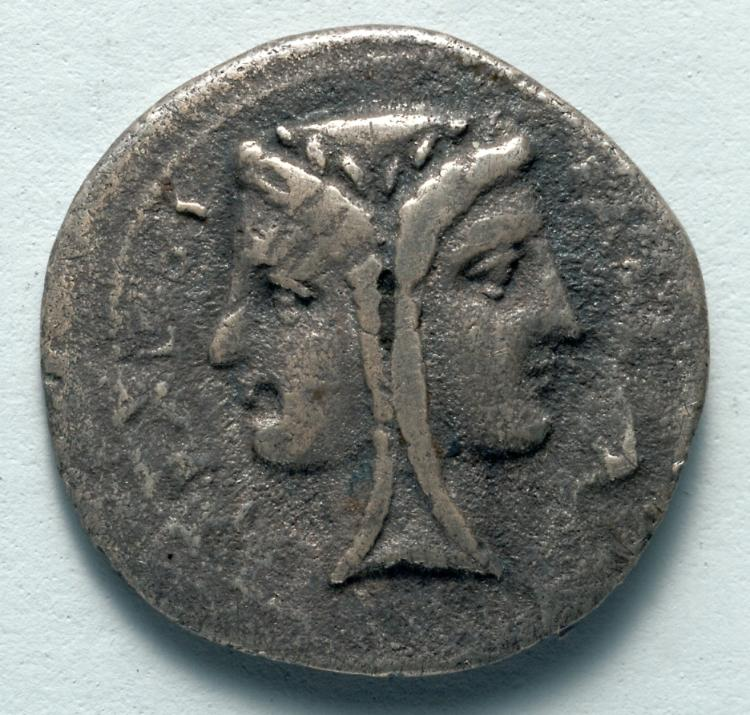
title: Two Litrae: Janiform Head, laureate (obverse)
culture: Greek, minted at Syracuse (Sicily)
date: 344–317 BCE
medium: silver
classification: Coins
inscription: ΣΥΡ[ΑΚΟΣΙOΝ]